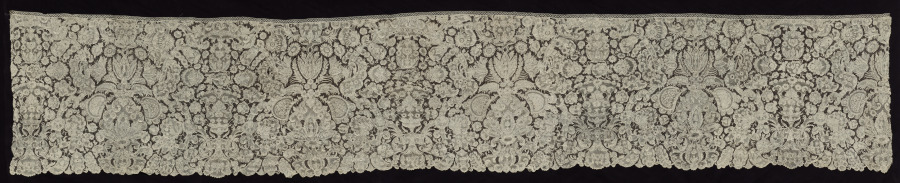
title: Lace Panel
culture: France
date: 1740–50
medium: Silk or cotton: needle lace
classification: Lace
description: The motifs in this lace panel were created separately and then joined with plaits and picot filling.